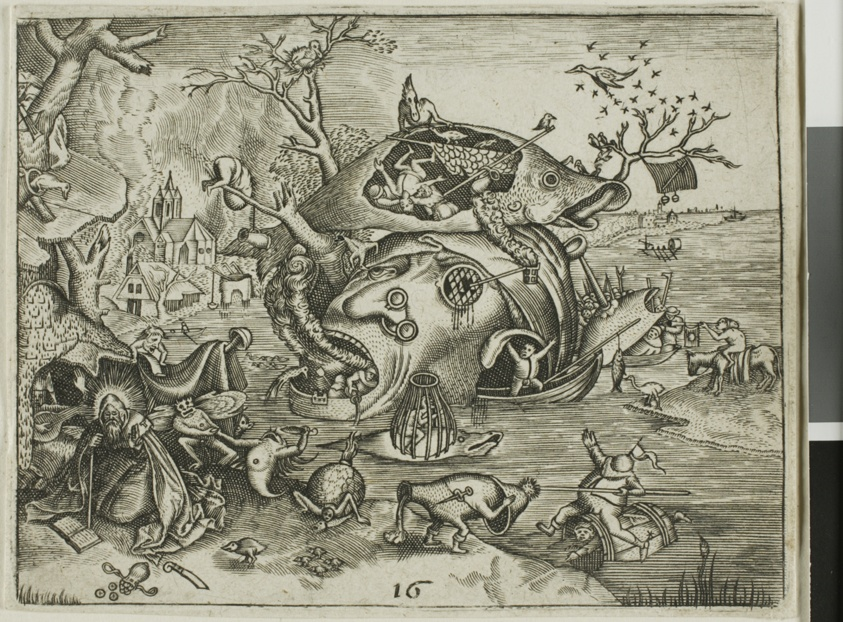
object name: Print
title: The Temptation of Saint Anthony, plate 16 from the Emblemata Secularia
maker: Johann Theodor de Bry (German, 1561-1623); after Pieter Breugel, the elder (Flemish, 1525/30-1569); published in the Emblemata Secularia by Johann Theodor de Bry, Frankfurt or Oppenheim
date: published 1596 or 1611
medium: Engraving in black on ivory laid paper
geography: Germany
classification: engraving; print; prints and drawing